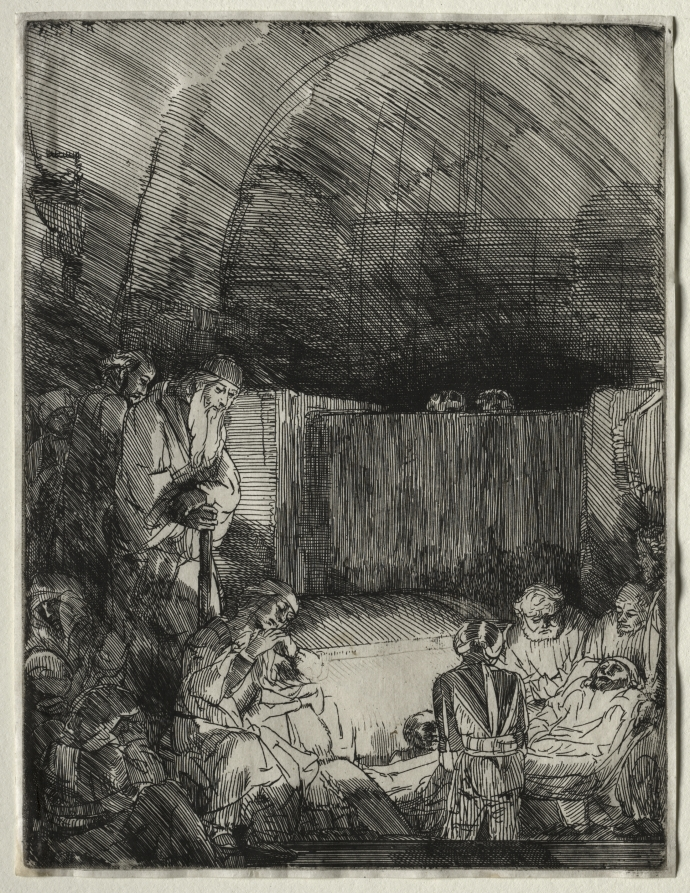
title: The Entombment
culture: Netherlands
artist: Rembrandt van Rijn (Dutch, 1606–1669)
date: c. 1654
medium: etching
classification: Print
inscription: VERSO, upper right, in pen and brown ink: J.B. ; uppper right, in graphite: 1798 ; lower left, in graphite: B. 86 I ; lower left, in graphite: 15 ; lower center, in graphite: 3- ; lower center, in pen and brown ink: Remy 1749 ; lower right, in graphite: B. 86 I ; lower right, in graphite: (From the / Edward / Rudge / coll / 1924)